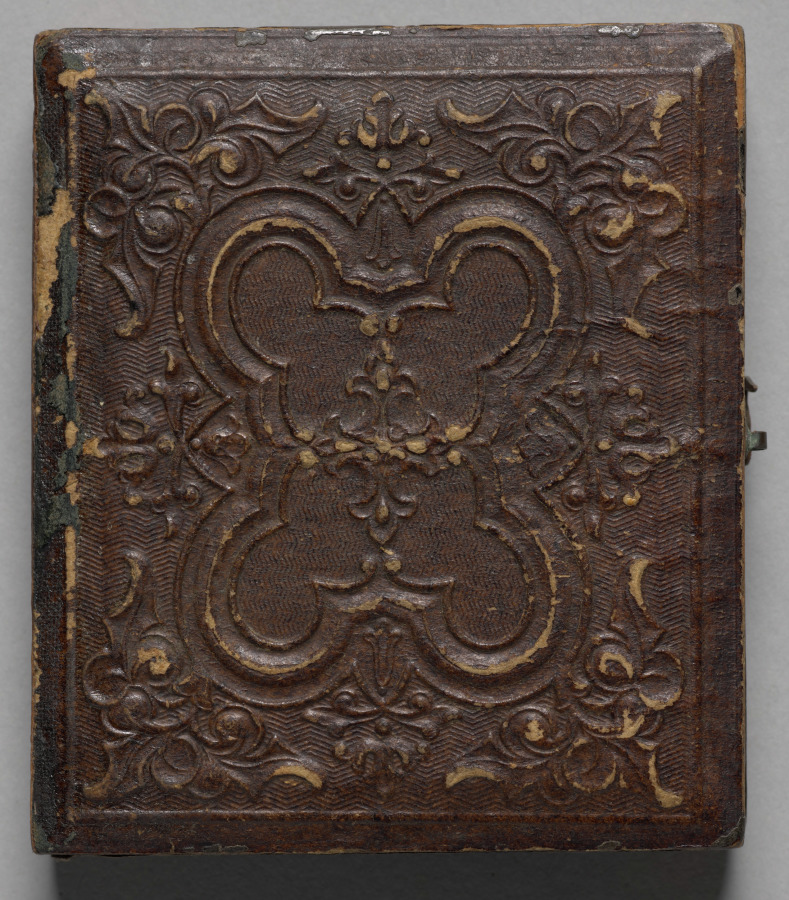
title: Child in off-shoulder polka dot dress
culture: America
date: c. 1860–65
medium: ambrotype, sixth plate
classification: Photograph